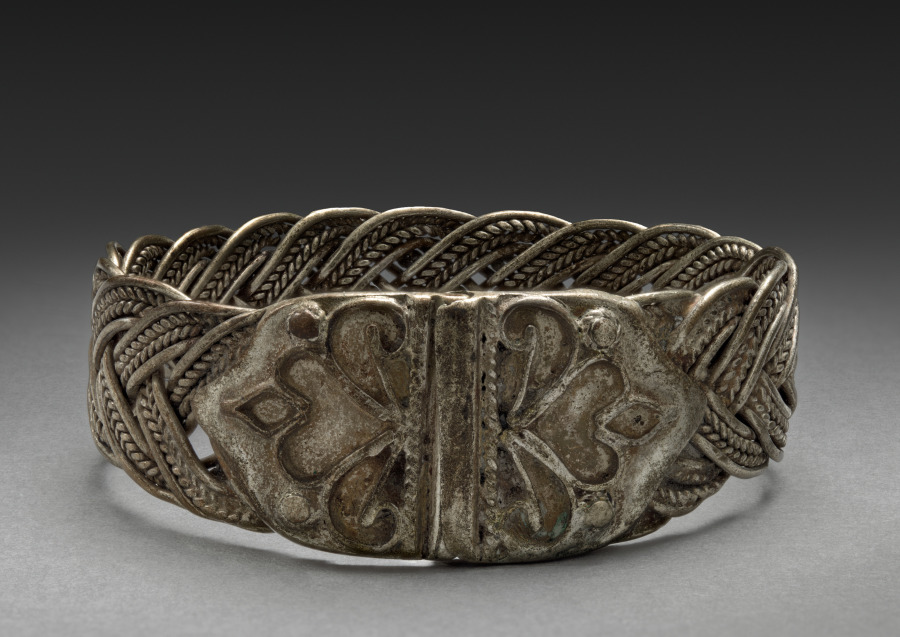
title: Bracelet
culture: Bulgaria, 18th-19th century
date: 1700s - 1800s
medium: silver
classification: Jewelry